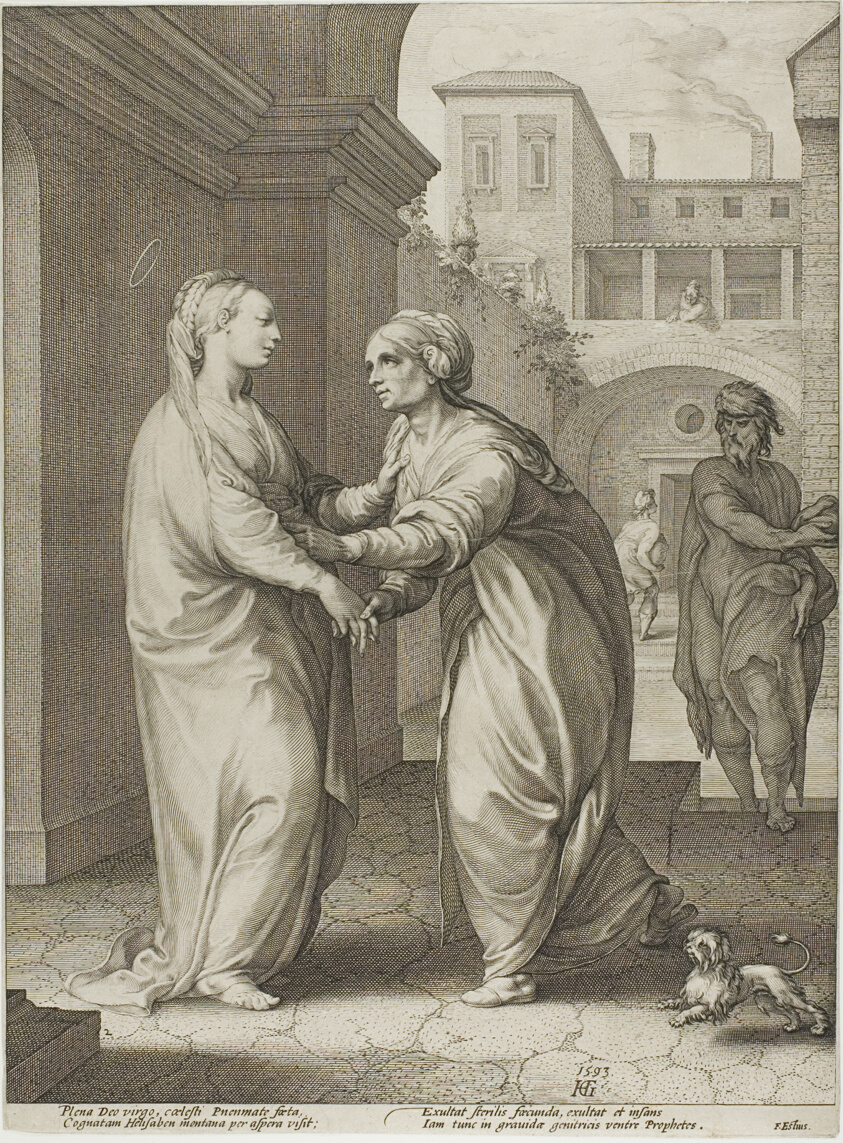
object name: Print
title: The Visitation, plate two from The Birth and Early Life of Christ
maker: Hendrick Goltzius (Dutch, 1558-1617); Text written by Franco Estius (Dutch c.1545-1594)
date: 1593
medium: Engraving in black on cream laid paper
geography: Netherlands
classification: engraving; print; prints and drawing